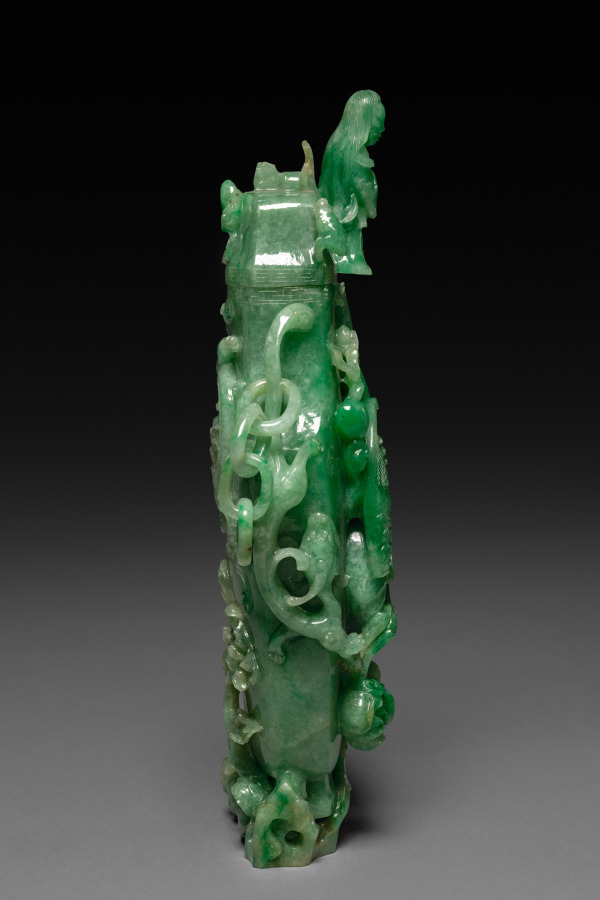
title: Three-Sectional Altar Group: Cylindrical Carving with Phoenix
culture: China, Qing dynasty (1644-1911)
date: 1644–1911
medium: jade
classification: Jade